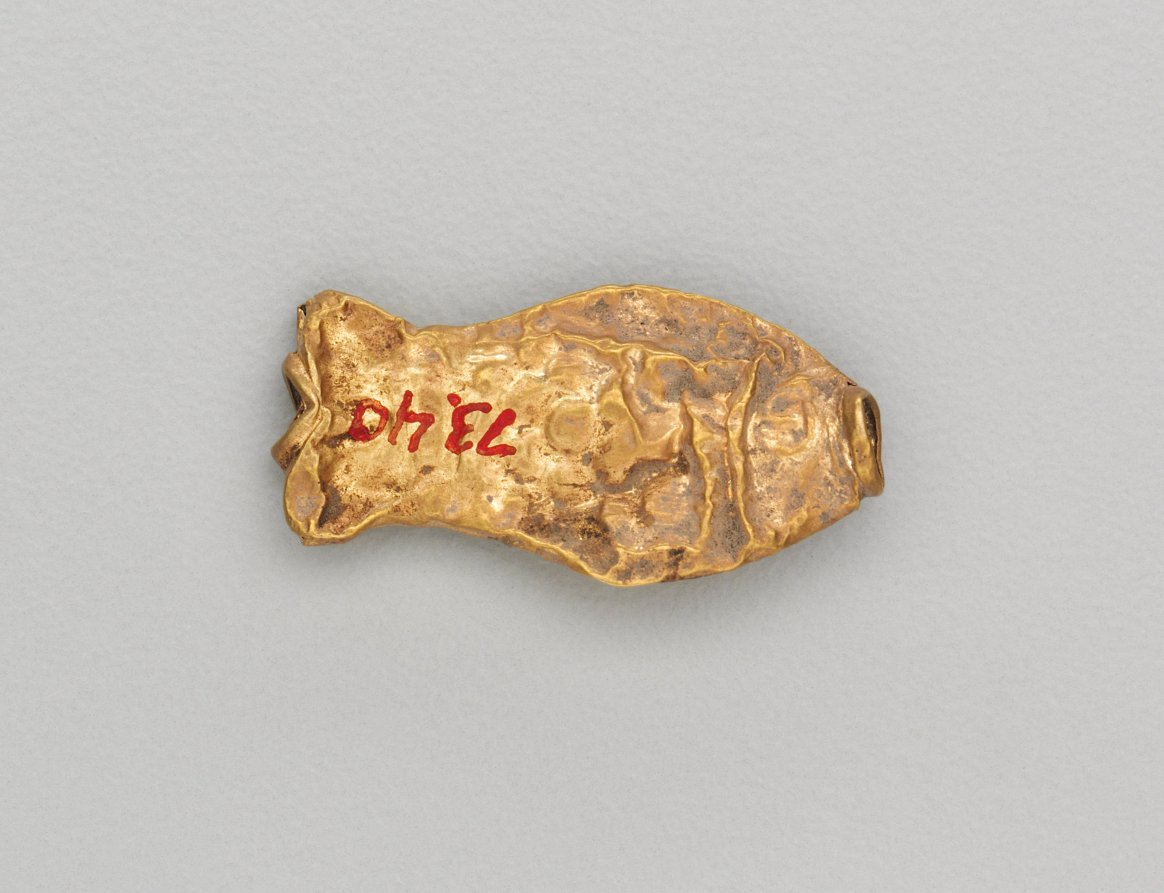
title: Necklace Bead in the Form of a Fish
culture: India, Shunga period (185–78 BCE)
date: 185–72 BCE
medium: gold repoussé with granulation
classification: Jewelry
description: Jewelry in ancient India often consisted of elements associated with water, such as fish and other aquatic plants and animals. Since water is essential for life, imagery that connotes water is life-affirming, or auspicious, and therefore appropriate adornment.